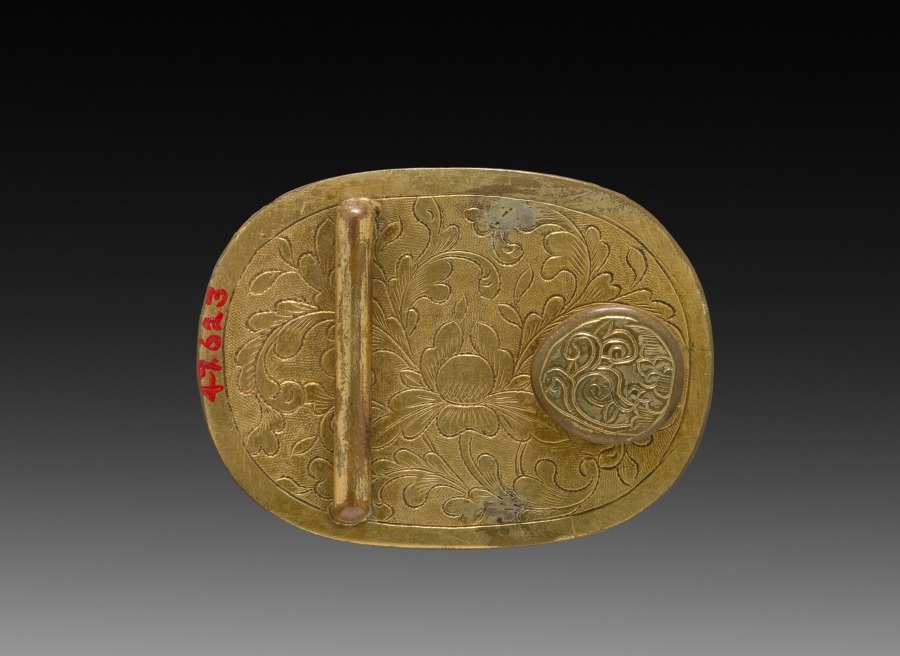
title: Buckle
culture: China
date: 1900s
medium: gilt brass set with green jade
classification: Jewelry